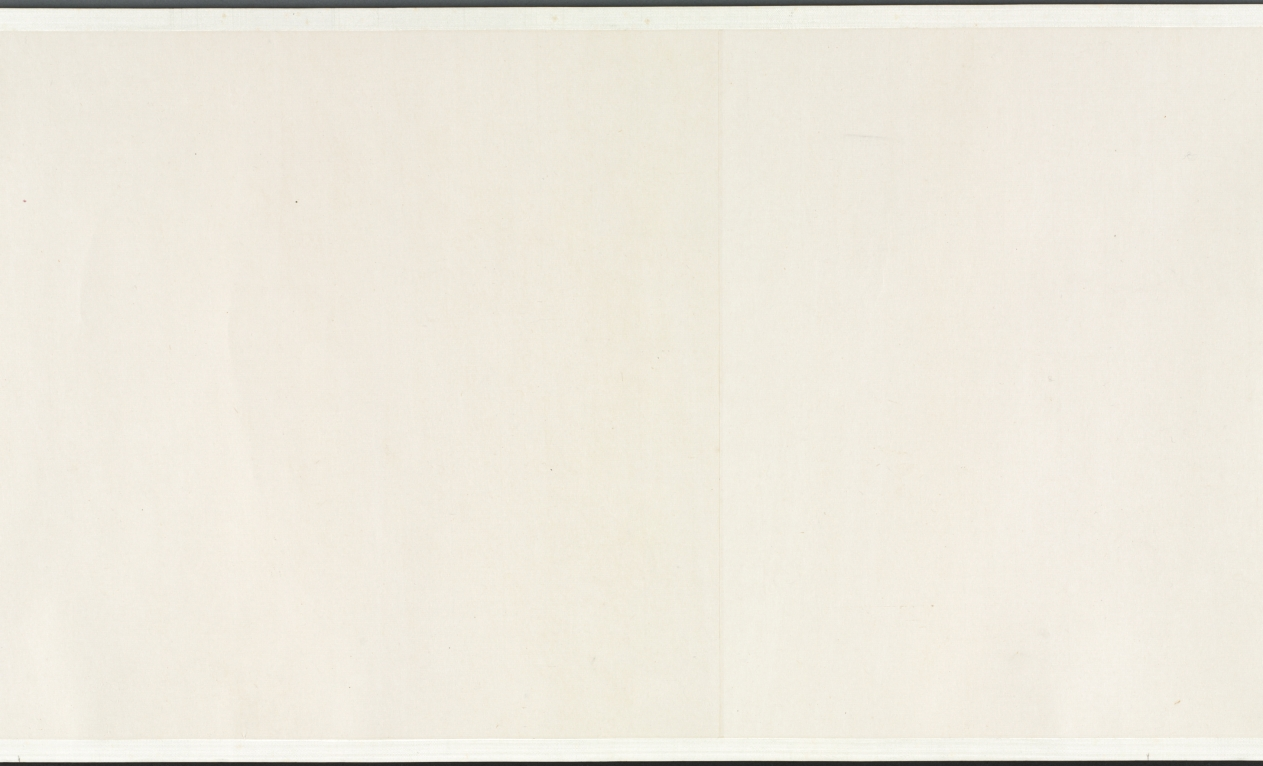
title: Buddha's Conversion of Five Bhiksu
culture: China, Yuan dynasty (1271–1368)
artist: Li Sheng (Chinese, active c. 1324–after 1375)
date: mid-1300s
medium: handscroll; ink on paper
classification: Painting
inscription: 紫篔生李升識 [印] 李氏子雲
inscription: 4 colophons and 12 additional seals: The "Heart" Sutra (Maha Prajnaparamita) text written by Wu Yuqing 吳餘慶 (active early 1400s); 2 seals of Xu Qianxue 徐乾學 (1631–1694); 3 colophons, one dated 1929 and two dated 1936, and 9 seals of Wu Hufan 吳湖帆 (1894–1968); 1 colophon, dated 1932, of Chen Dingshan; 1 seal unidentified.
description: This episode stems from the life of the historical Buddha, who, after his enlightenment, was initially hesitant about preaching his own doctrine. After much personal deliberation and prodding by deities, he finally relented. The first converts were the five guards who served him when he was still a prince. For Li Sheng, this is the pretext of the painting, which moves from the interaction of the bhiksu with the Buddha to a broader awareness of the vast surroundings of the scene.